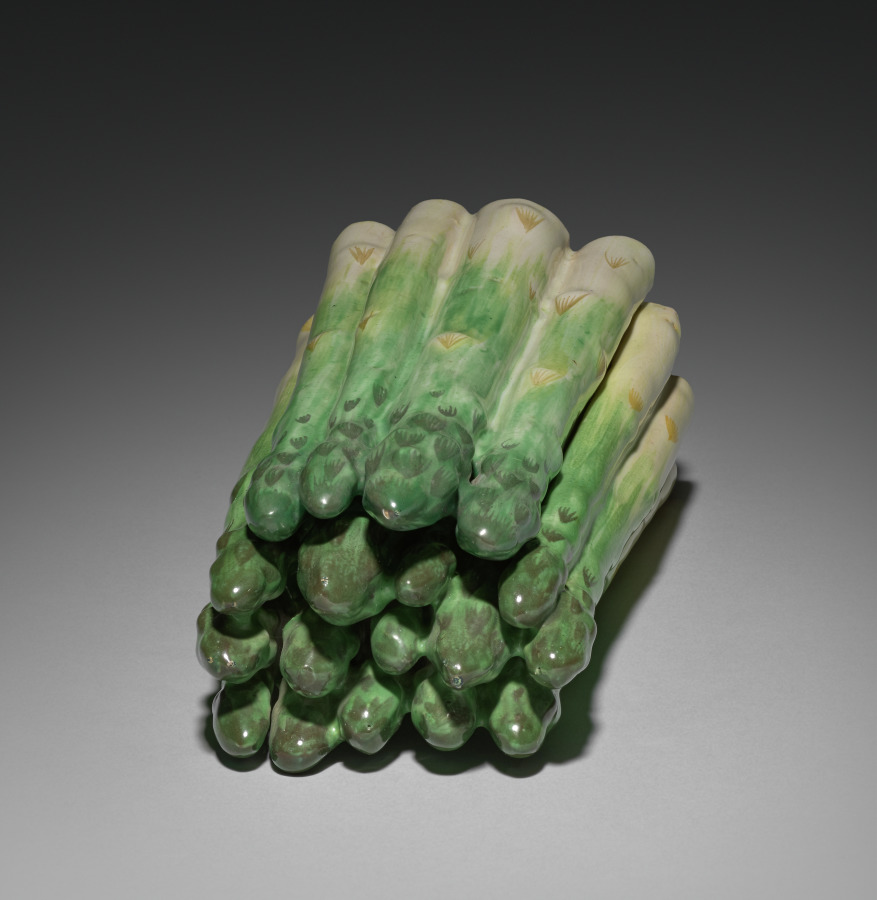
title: Box in the Form of Asparagus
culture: France, Sceaux(?), 18th century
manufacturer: probably by Sceaux Factory (French, active 1748–66)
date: c. 1765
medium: tin-glazed earthenware (faience) with enamel decoration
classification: Ceramic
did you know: Placed upon the dinner table, this container's lid might be lifted to reveal steaming asparagus. Imagine a wealthy 18th-century dining room with flickering candles, whimsical sculptures, and dishes like this decorating the table.